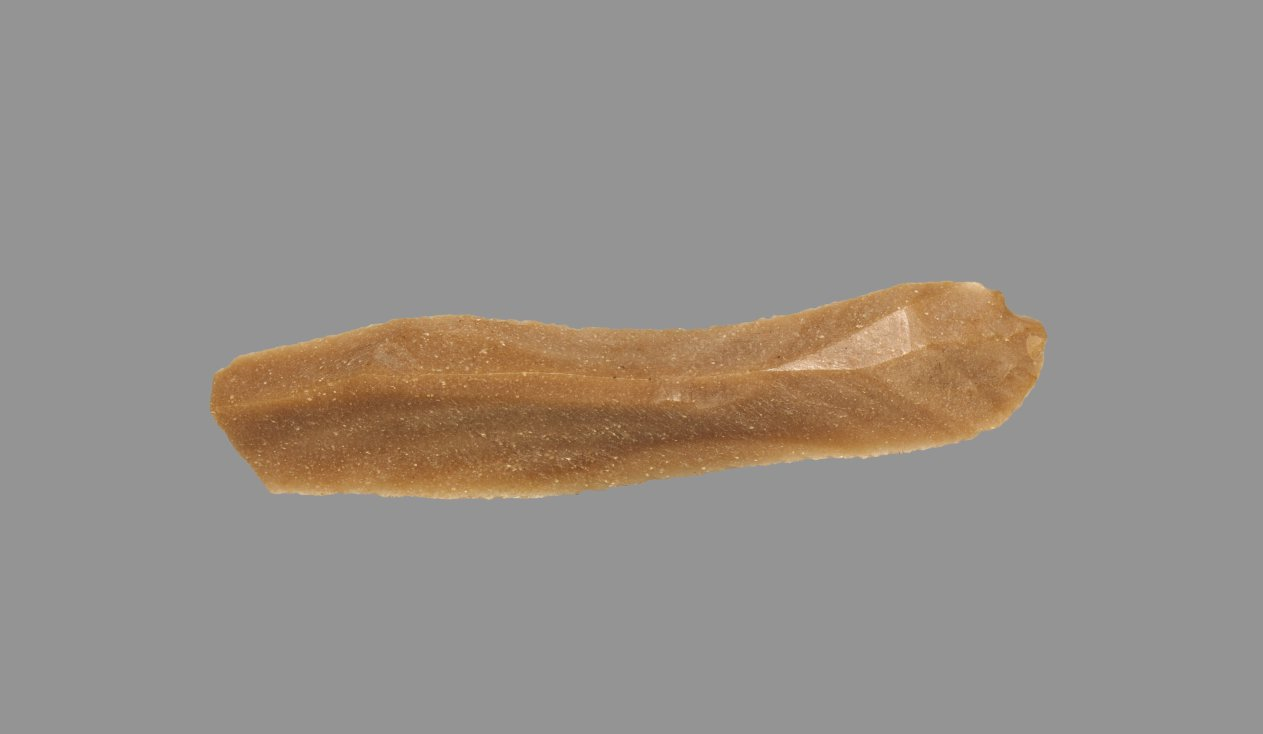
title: Sickle Blade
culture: Egypt, Middle Kingdom (2040–1648 BCE), Dynasty 12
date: 1980–1801 BCE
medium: flint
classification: Implements